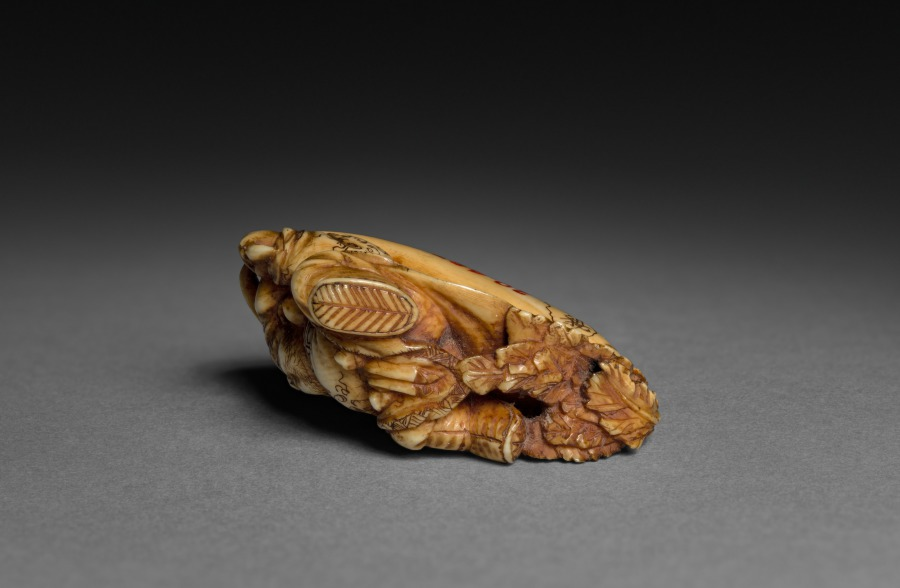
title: Daiitoku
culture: Japan, Edo period (1615–1868)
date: early to mid-1800s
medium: ivory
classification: Netsuke